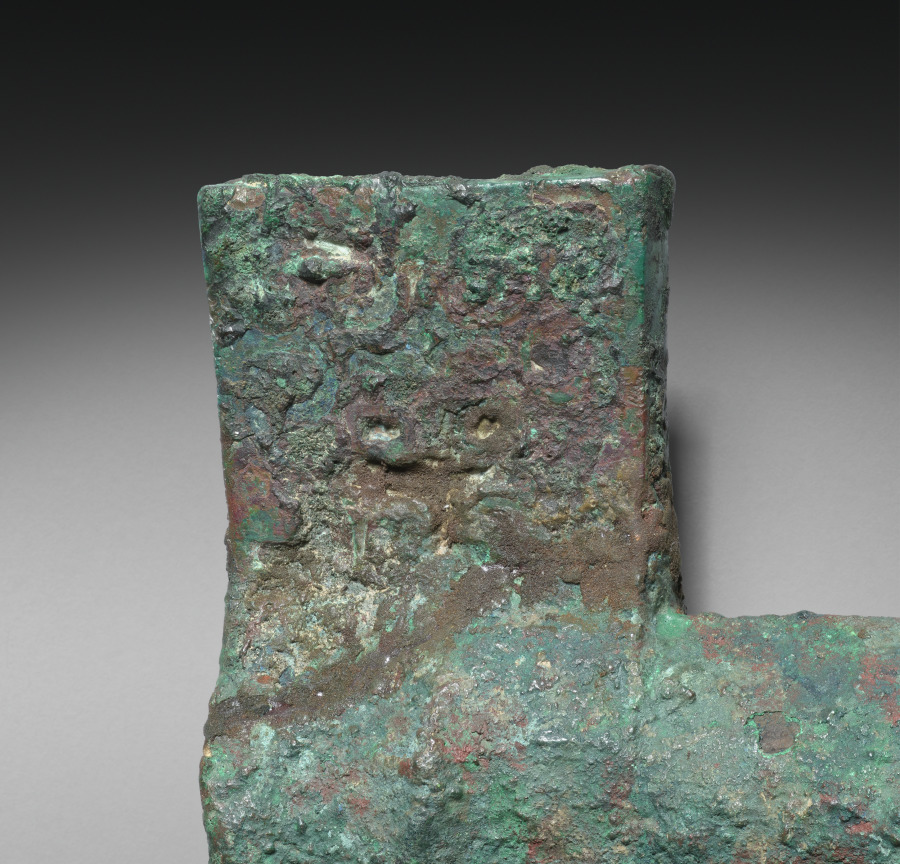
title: Axe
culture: China, Shang dynasty (c. 1600–c. 1046 BCE)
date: 1766–1045 BCE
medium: bronze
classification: Metalwork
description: The head of an owl with large eyes and ears, sitting above the blade of a halberd-axe, may have deterred evil and harm from its carrier. Whether such an axe was used in ritual or warfare is not clear.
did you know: A staff or pike would have attached to the blade via the socket below the owl's head.